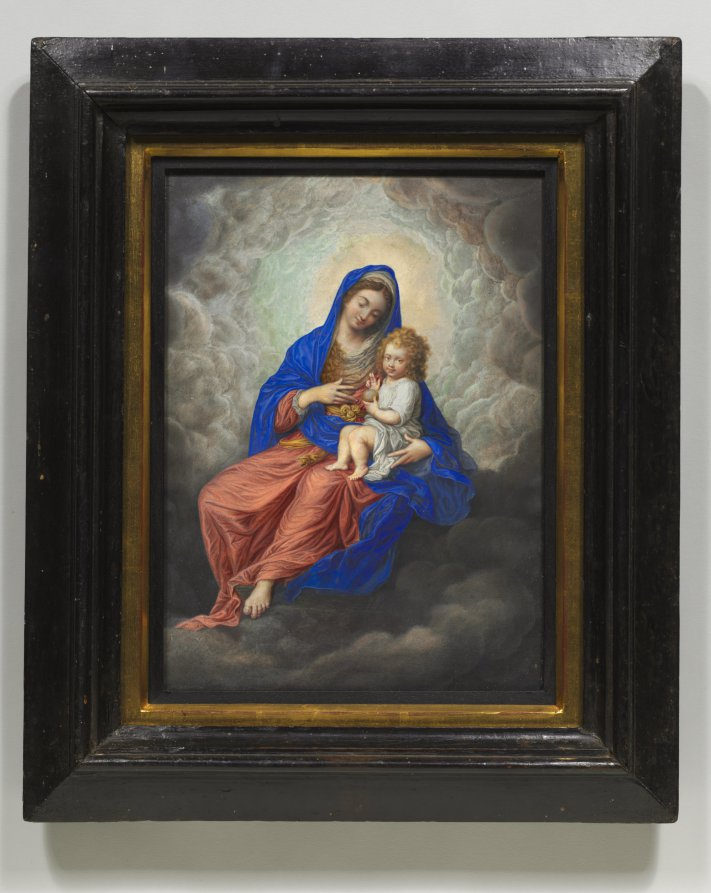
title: Madonna and Child in Glory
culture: England, 17th century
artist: Isaac Oliver (French, c. 1565–1617)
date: c. 1605–1617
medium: gouache and watercolor, heightened with gum arabic, with shell gold framing lines, on vellum, mounted on paper, vellum, and wood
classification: Portrait Miniature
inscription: signed with monogram in gold, lower right: "IO"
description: It is difficult to overstate the singularity of this work in 17th-century England. While the image has visual sources in works by Rubens and Federico Barocci, surely known to the cosmopolitan artist (who travelled to Italy, unusually for English artists at this moment), the object is iconographically unique. Oliver places a tender Virgin and Child (itself more closely linked to Catholic instead of Protestant imagery), in a heavenly, visionary setting, and incorporates the medieval iconography of the lactating Virgin with the Salvator Mundi, early Netherlandish in origin, but more commonly an Italian typology by the early seventeenth century.